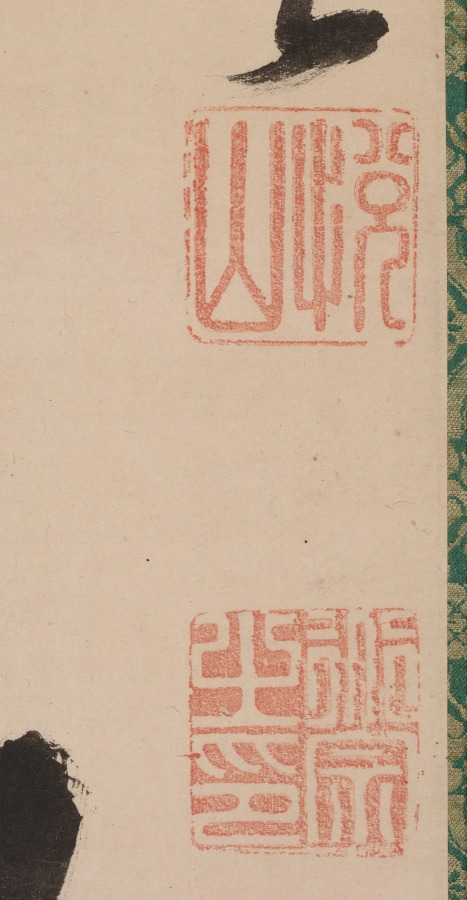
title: Calligraphy in Semi-Cursive Style (xing-caoshu)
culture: China, Qing dynasty (1644-1911)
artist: Yueshan Daozong (Chinese, 1629–1709)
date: c. 1660–1709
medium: hanging scroll; ink on paper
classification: Calligraphy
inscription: 吟風一樣松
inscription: 悅山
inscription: 道宗之印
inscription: Linji zheng zong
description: This bold calligraphy written by Yueshan, an Ōbaku school monk, consists of five characters tentatively translated as “Pine trees singing in the wind.” The line is from Cold Mountain Poems (Hanshan shi). Cold Mountain is the pen name (hao) of the poet monk Han Shan, as well as the name of a place. In one poem Han describes getting lost on the road to Cold Mountain, perhaps an allusion to the search for religious enlightenment.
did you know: The Ōbaku school of Chan (Zen in Japanese) Buddhism was founded in Japan by Chinese monks in the 1600s. The monk Yueshan emigrated from the Chinese province of Fujian to serve as priest and later abbot at Manpukuji, the headquarters of the Ōbaku school in Japan.